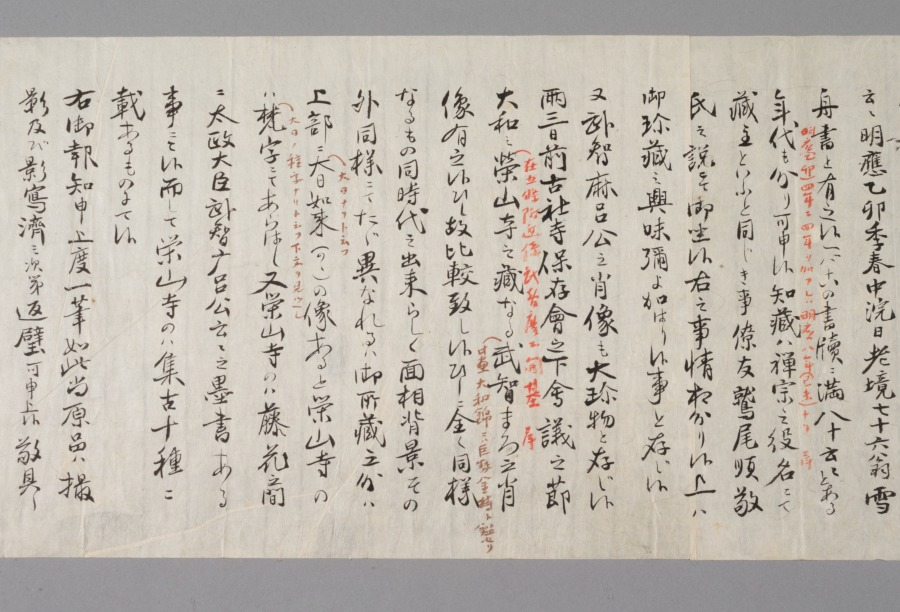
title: Fujiwara no Muchimaro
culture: Japan, Kamakura period (1185–1333)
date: 1200s or 1300s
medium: Hanging scroll; ink, color, gold, and cut gold on silk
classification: Painting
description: This portrait of Fujiwara no Muchimaro (680–737), a grandson of Fujiwara no Kamatari (614–669), includes an image of Buddha Dainichi Nyorai above his head. By situating the image of Dainichi there, this painting would seem to assert that Muchimaro is an avatar of Dainichi. In the same way that kami could be identified with Buddhist counterparts, powerful humans could also be seen as manifestations of Buddhist deities. A similar painting is at Eizanji in Nara, of which Muchimaro is known as the founder. It was once a branch temple of Kōfukuji, the Fujiwara family temple.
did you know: The boughs of wisteria appearing in the background symbolize the figure's status as a Fujiwara family member.